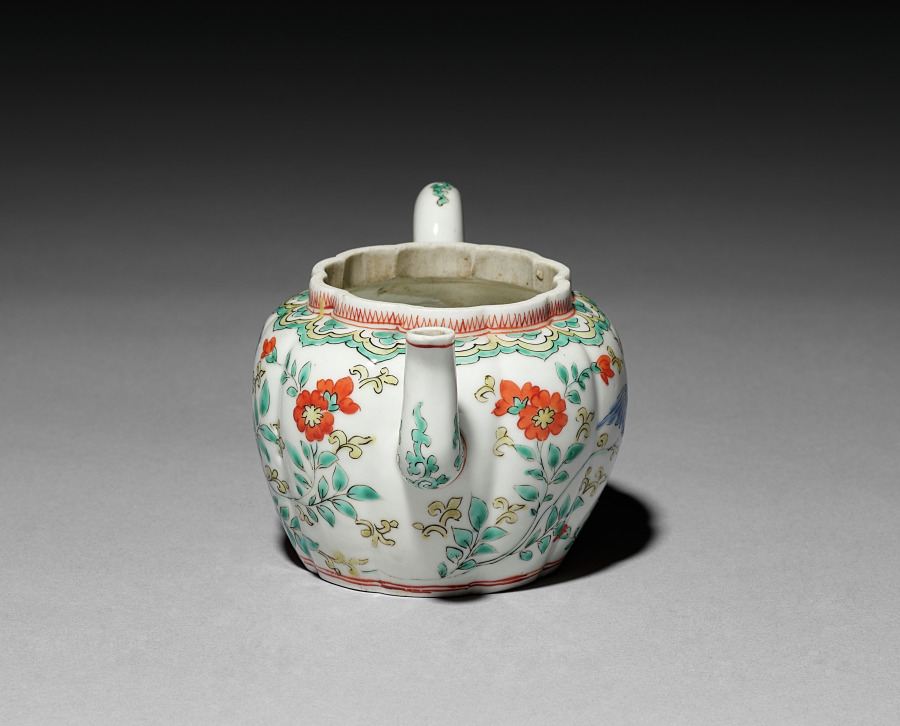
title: Teapot with Birds and Flowers (base)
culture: Japan, Edo period (1615–1868)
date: 1700s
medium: Porcelain with overglaze color enamel (Arita ware)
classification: Ceramic